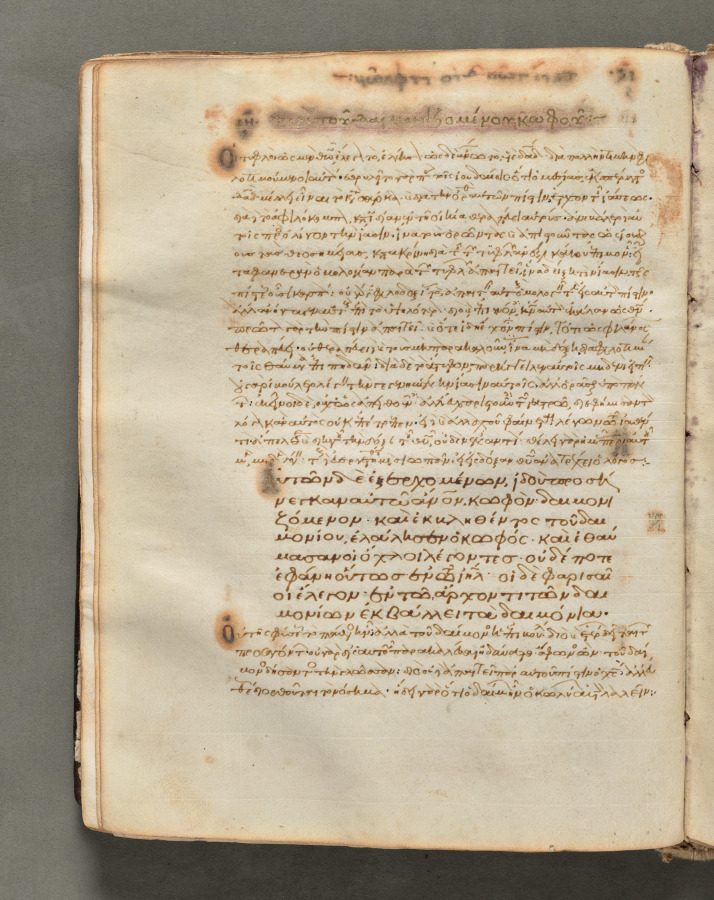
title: Text, folio 40 (verso), from a Gospel Book with Commentaries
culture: Byzantium, Constantinople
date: c. 1000–1100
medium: ink, tempera, and gold on vellum; leather binding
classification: Bound Volume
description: Each of the four gospels in this book opens on a page with brilliantly illuminated borders depicting the author of the text as well as birds-principally peacocks, symbols of the immortality of the soul-and fountains, representing the fountain of life and the salvation of the soul. This volume consists of 428 leaves with texts in Greek. Its level of sophistication suggests that it was probably written and decorated in a monastery in Constantinople.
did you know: Gospel Books were carried in procession through Byzantine churches.